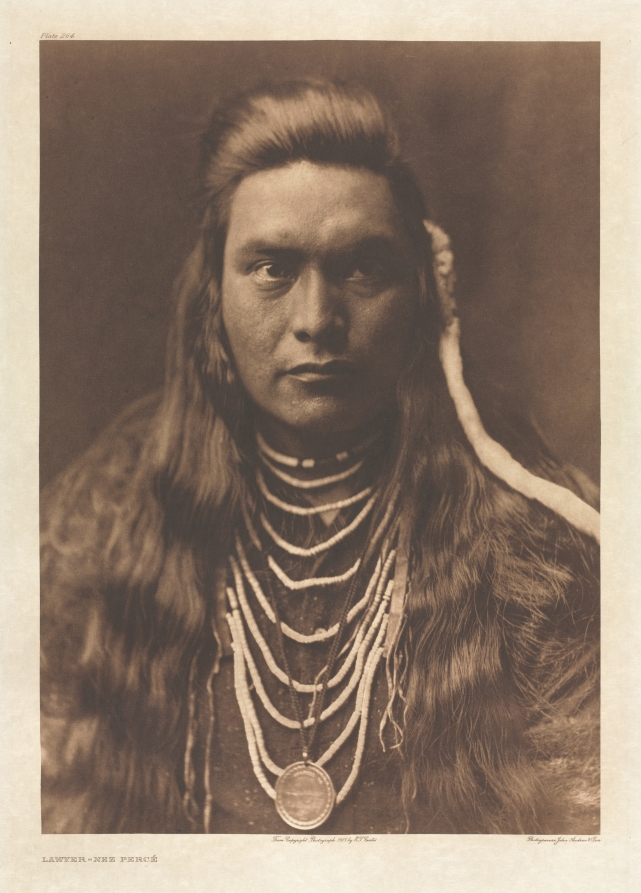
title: Portfolio VIII, Plate 264: Lawyer - Nez Percé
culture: America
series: The North American Indian: being a series of Portfolios picturing and describing the Indians of the United States, the Dominion of Canada, and Alaska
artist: Edward S. Curtis (American, 1868–1952)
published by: The University Press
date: 1905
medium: photogravure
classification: Portfolio